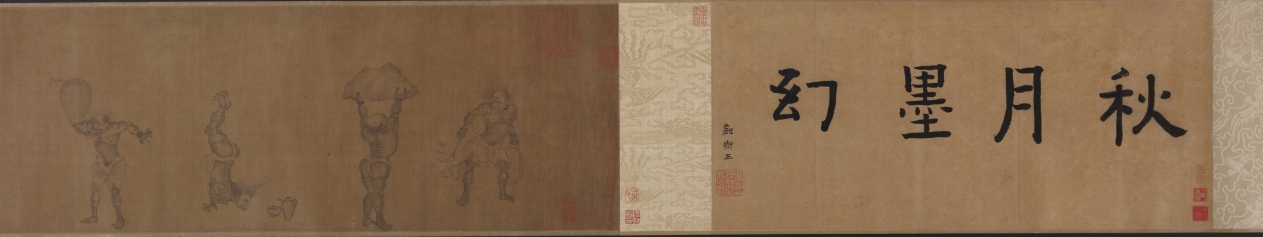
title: The Lantern Night Excursion of Zhong Kui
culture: China, Yuan dynasty (1271-1368)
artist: Yan Hui (Chinese, active 1270–1310)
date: late 1200s–early 1300s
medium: handscroll; ink and slight color on silk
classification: Painting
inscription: Artist's signature [and probable seal]: Yan Qiuyue 顏秋月 Title on frontispiece and 1 seal of Niu Shuyu 鈕樹玉 (1760–1827): Qiuyue mohuan 秋月墨幻 [Qiuyue's Ink Fantasy]. 31 additional seals: 2 of Yang Shiqi 楊士奇 (1365–1444); 2 of An Guo 安國 (1481–1534); 8 of Xiang Yuanbian 項元汴 (1525–1590); 2 of Geng Zhaozhong 耿昭忠 (1640–1686); 4 of Pu Tung 溥侗 (1870–1952); 7 of Tan Jing 譚敬 (1911–1991); 1 of Liu Ting-chih (20th c.); 5 unidentified.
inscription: An inscription by Zizhi Shanren 紫芝山人 [probably Jiang Hui 蔣惠], dated 1389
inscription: An inscription by Wu Kuan 吳寬 (1436–1504)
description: Here, the demon queller Zhong Kui leads a nightly procession of street entertainers with bare, muscular bodies and demonic faces. Some wear shabby clothes, and all perform stunts and tricks to astound and scare the viewer. In fact, a New Year custom in cities of southeast China had the poor, disguised as demons, process through the streets and play their tricks to clear households of evil spirits and welcome the spring. From right to left, a demonic figure leads the procession and beats a drum; another lifts a large rock; one stands on his hands trying to drink; one balances a jar on his elbow; three hold and wield weapons; one carries a folded chair covered by a cow’s skin; another holds Zhong Kui’s qin (zither), books, brush, and inkstone. At the end of the scroll, two figures offer a cup and bottle of wine to Zhong Kui, who lifts his hand in command.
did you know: Zhong Kui was an ancient ghostbuster.